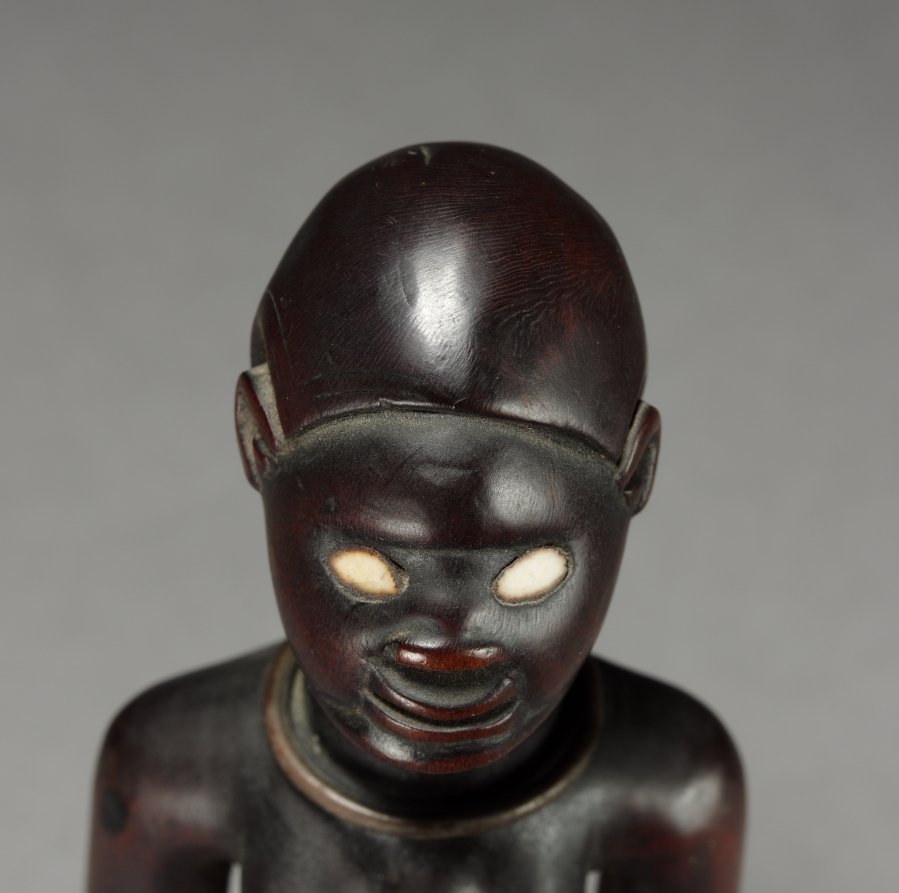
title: Female Figurine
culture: Africa, Central Africa, Republic of the Congo, Beembe-style maker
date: late 1800s-early 1900s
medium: Wood, possibly ceramic, and copper alloy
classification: Sculpture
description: Beembe figurines generally have greatly detailed anatomical and decorative features. The scarification among Beembe men and women communicated their ideas about local beauty and ethnic belonging. These figures are charged with an ancestor’s spirit through a mixture of resin and human-derived ingredients—taken from the corpse of the person they possibly portray—into a small cavity near the rectum.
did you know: The carvings in the figure’s abdomen reflect the custom of body scarification among the Beembe people.